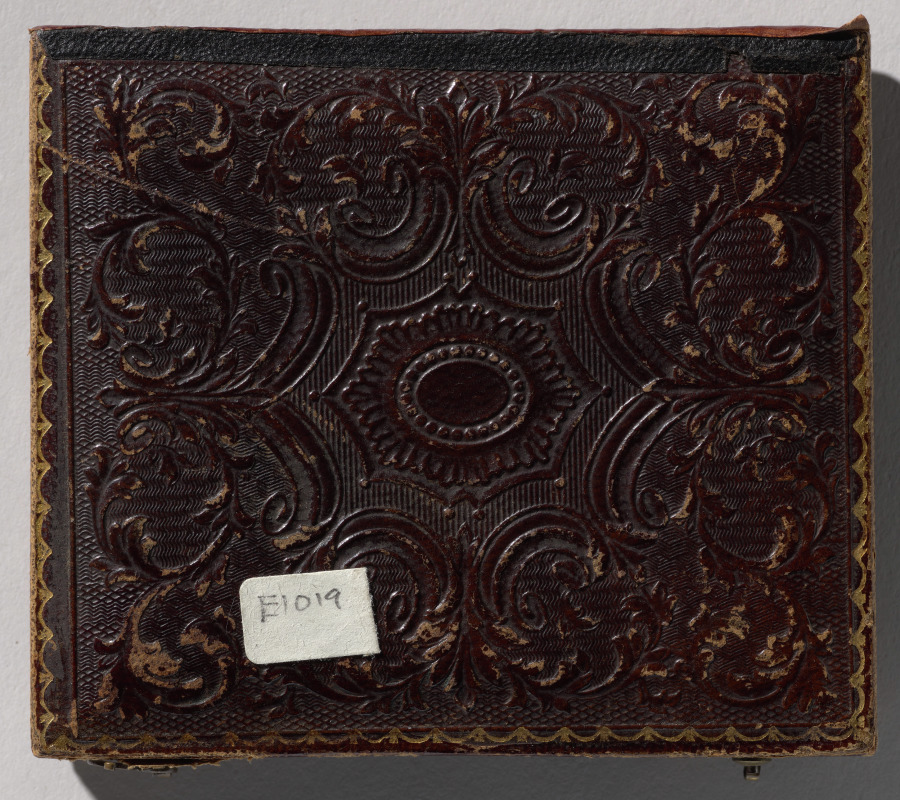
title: Post-Mortem on Pillow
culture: America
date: c. 1855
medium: ambrotype, tinted, sixth plate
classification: Photograph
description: Children have always been particularly cherished subjects for photography. Portraits were made to preserve the memory of their stages of growth and, in an age when long-distance travel was rare, to share with faraway relatives. And, for a sadder reason: in 1840 an estimated one-third of children died before age five. Photography offered grieving parents the opportunity to immortalize their children’s features. This tragic genre of photographs, later called “post-mortems,” often depicts the children in fine clothing, laying down with eyes shut, as if merely napping.